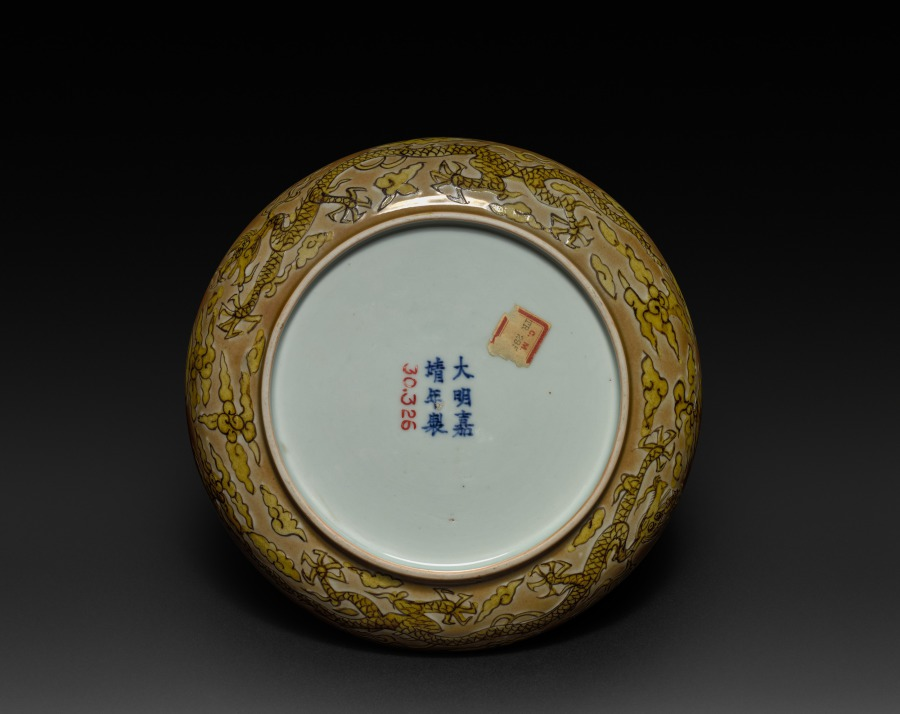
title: Dish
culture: China, Jiangxi Province, Jingdezhen kilns, Ming dynasty (1368–1644), Jiajing mark and reign (1522–66)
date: 1522–66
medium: porcelain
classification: Ceramic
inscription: 大明嘉靖年製